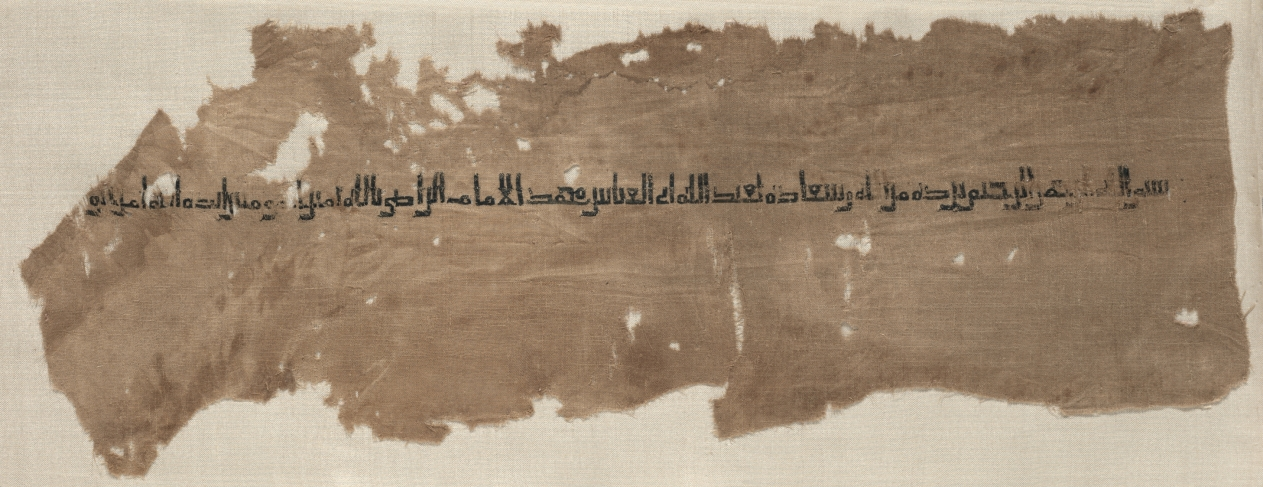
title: Fragment of a Tiraz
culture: Egypt, Ikhshidid period, Caliphate of al-Radi, AH 322-329 (A.D. 934-940)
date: 934 – 940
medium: tabby ground with inwoven tapestry inscription; linen and silk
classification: Textile